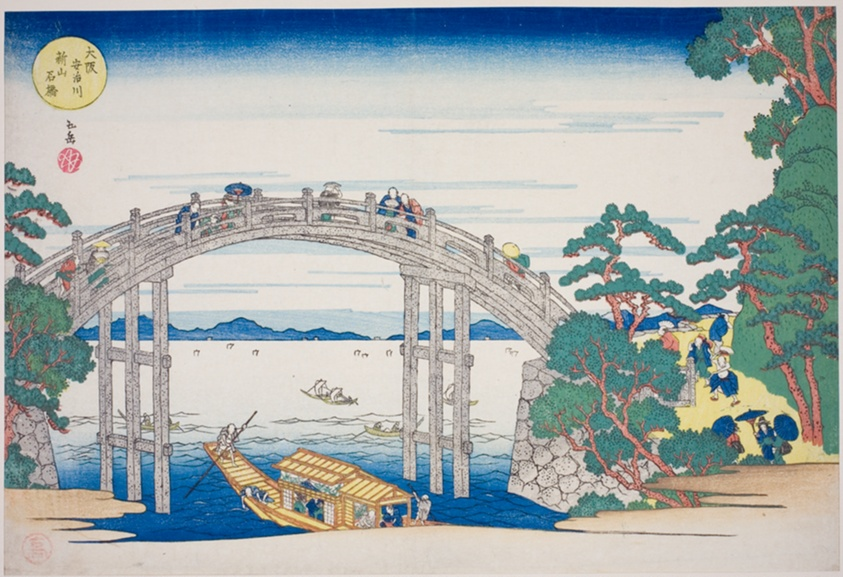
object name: Print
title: The Stone Bridge over the Aji River near Nii Hill, Osaka (Osaka Ajigawa Niiyama ishibashi), from the series "Famous Places in Osaka: Fine Views of Mount Tenpo (Naniwa meisho Tenpozan shokei ichiran)"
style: Japanese (culture or style)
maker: Yashima Gakutei (Japanese, 1786 (?)-1868)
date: c. 1834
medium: Color woodblock print; oban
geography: Japan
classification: woodblock print; print; asian art